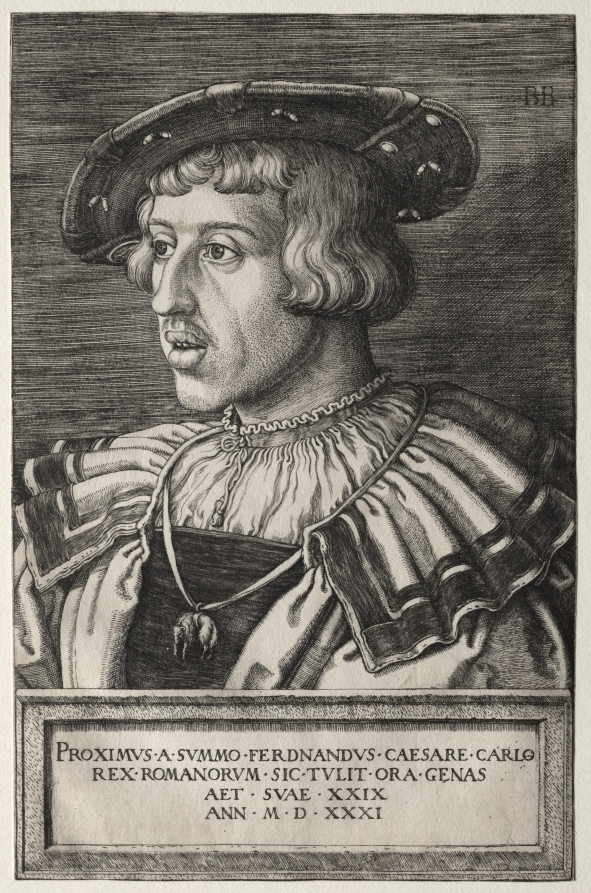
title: Ferdinand I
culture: Germany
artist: Barthel Beham (German, 1502–1540)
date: 1531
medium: engraving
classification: Print